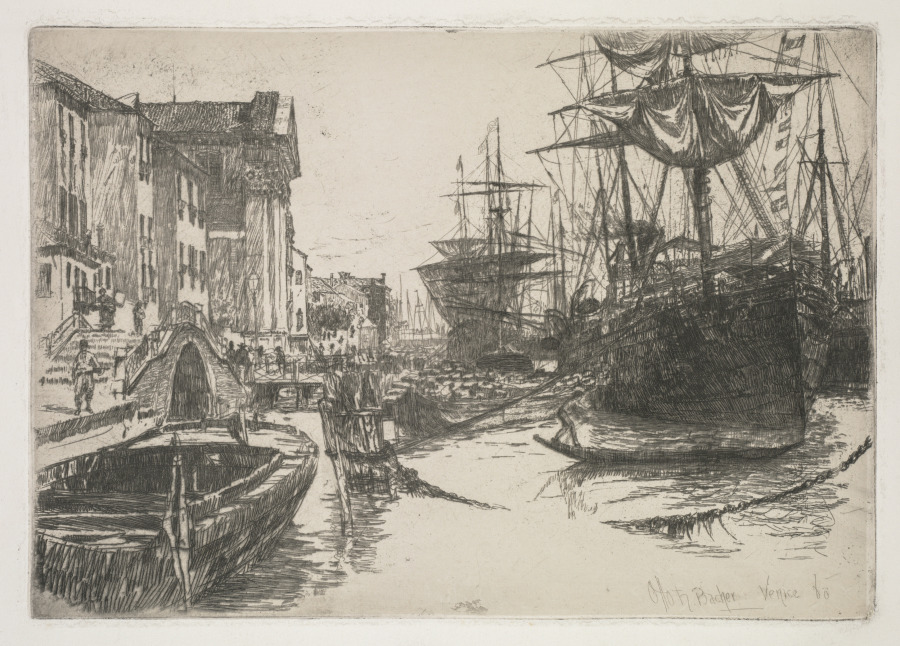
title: Fondamenta della Zattere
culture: America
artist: Otto H. Bacher (American, 1856–1909)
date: 1880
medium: etching on chine collé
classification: Print